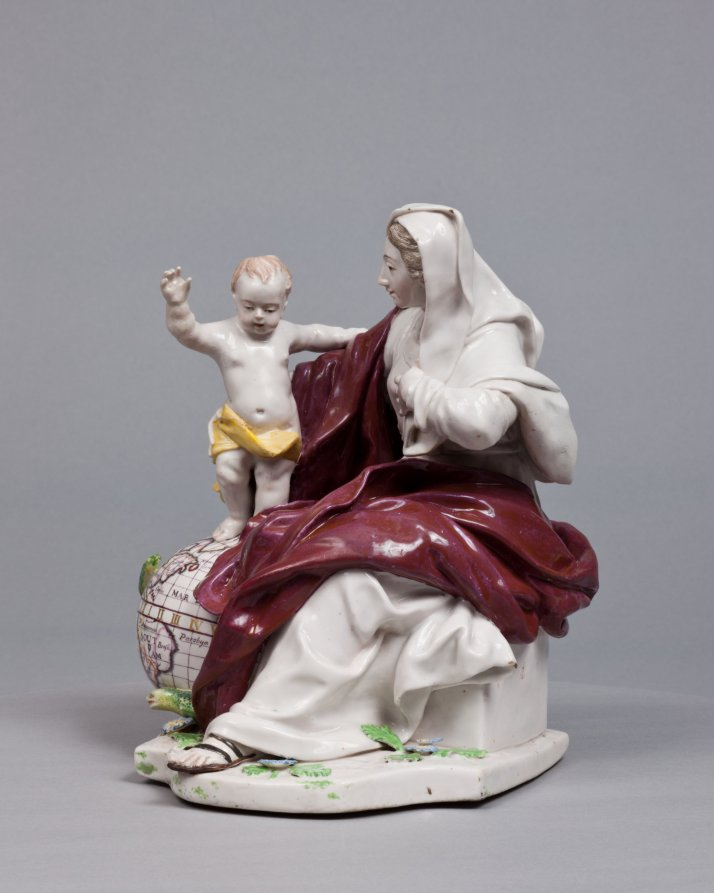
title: Madonna and Child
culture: England, Chelsea, 18th century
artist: Chelsea Porcelain Factory (Britain, London, 1745–84)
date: c. 1755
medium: porcelain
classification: Ceramic